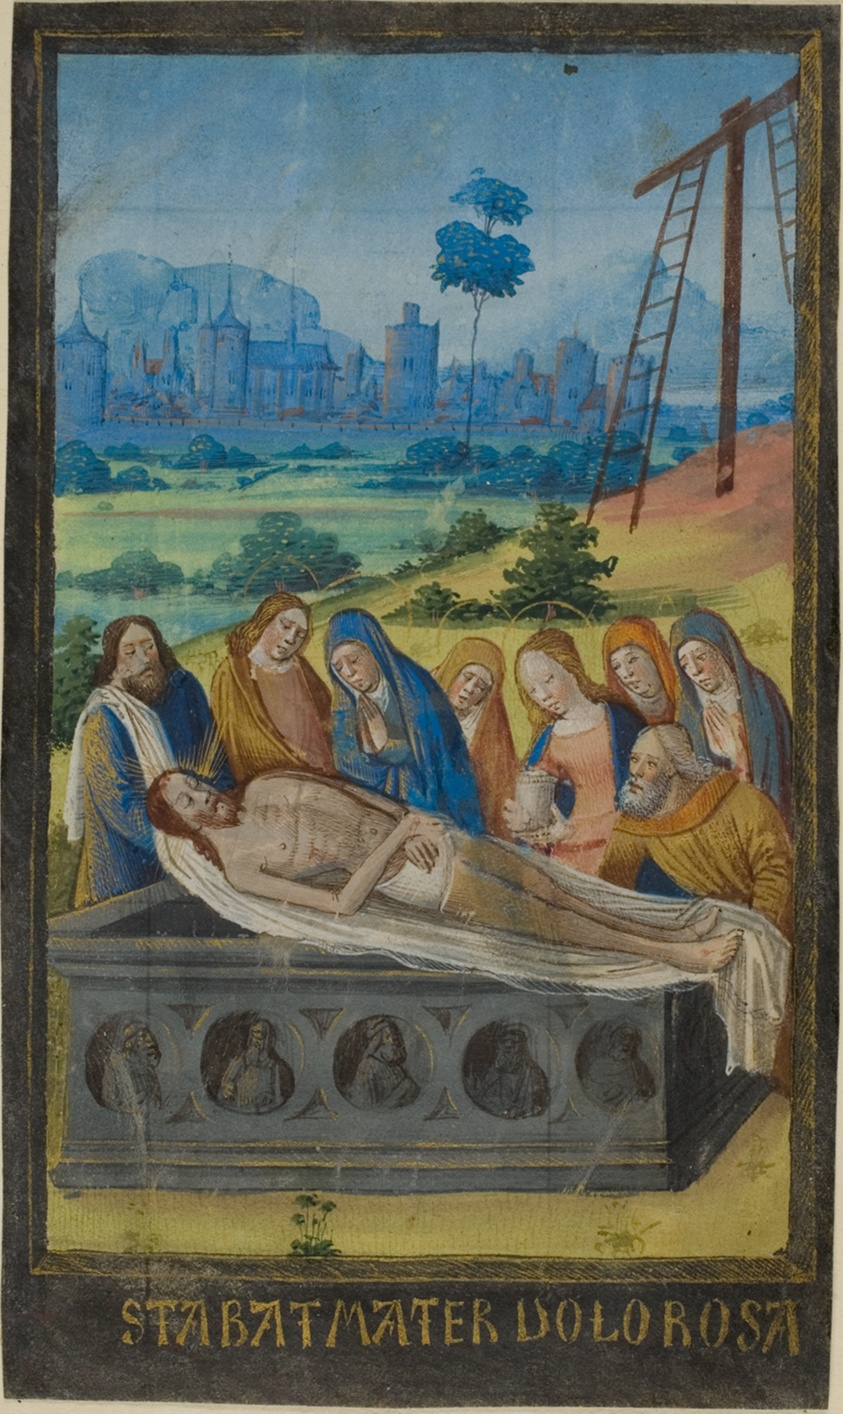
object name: Drawing and Watercolor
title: The Entombment (Stabat Mater Prayer), from a Book of Hours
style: medieval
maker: circle of Jean Colombe; French (Bourges), flourished 1463-before 1498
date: c. 1480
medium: Manuscript cutting in tempera and gold paint, with littera batarda inscriptions in gold, recto, and light black, verso, on parchment dyed black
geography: France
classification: tempera; manuscript; drawings (visual works); prints and drawing